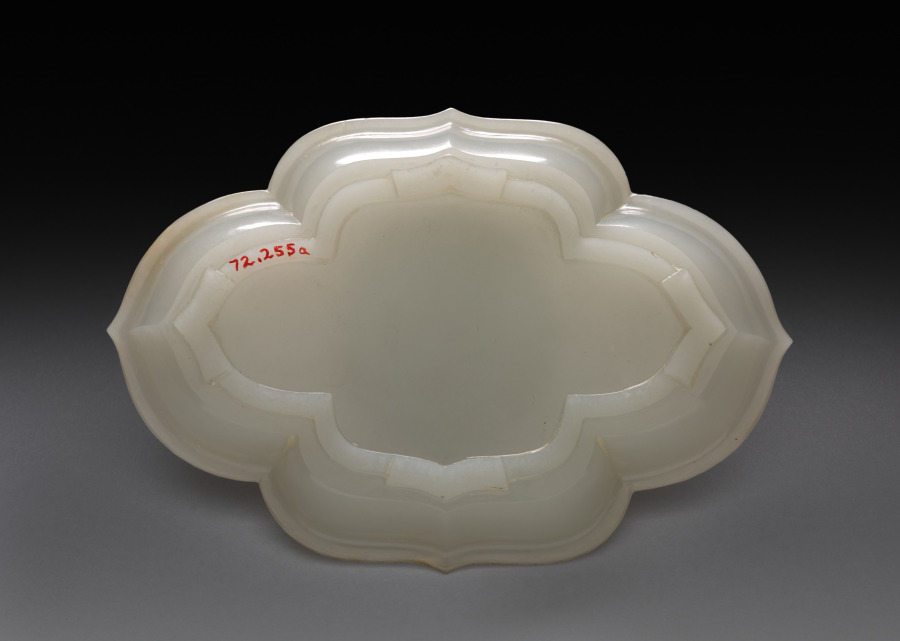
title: Lotus-shaped Dish and Cup (dish)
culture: China, Qing dynasty (1644–1911), Qianlong reign (1736–95)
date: 1736–95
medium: jade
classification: Jade